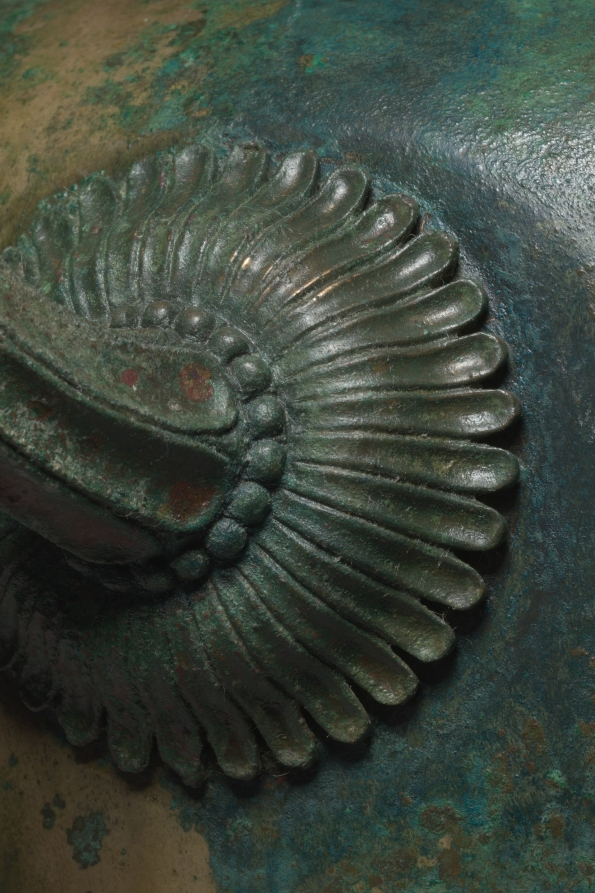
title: Hydria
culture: Greece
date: 425–400 BCE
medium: bronze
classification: Metalwork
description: This vessel gets its name from a shape of earthenware jar that was used to carry water. This bronze hydria was probably used not to carry water but as a cinerary urn (kalpis). The figure on the handle is the mythological siren, a human-headed bird.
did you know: This bronze vessel was likely used as a funerary urn.